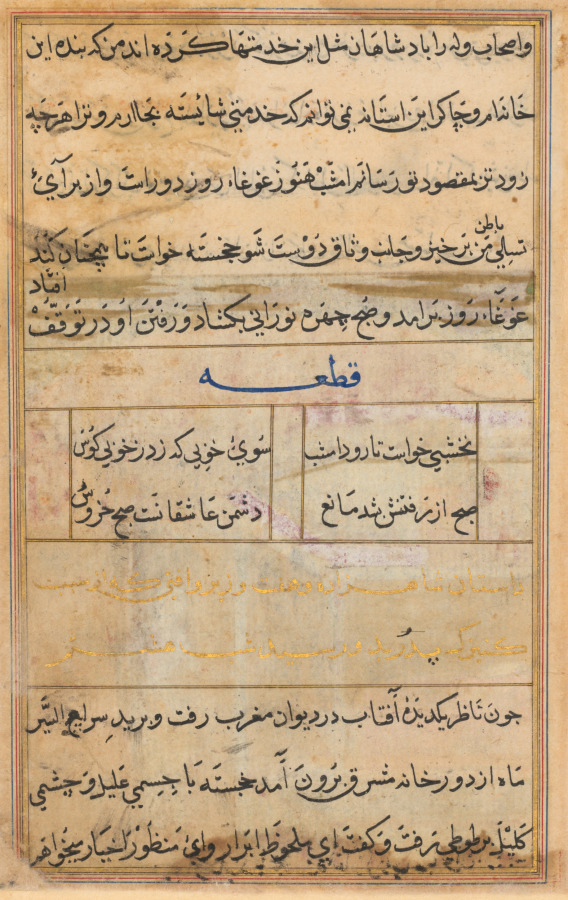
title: Page from Tales of a Parrot (Tuti-nama): text page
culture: Mughal India, court of Akbar (reigned 1556–1605)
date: c. 1560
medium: gum tempera, ink, and gold on paper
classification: Painting